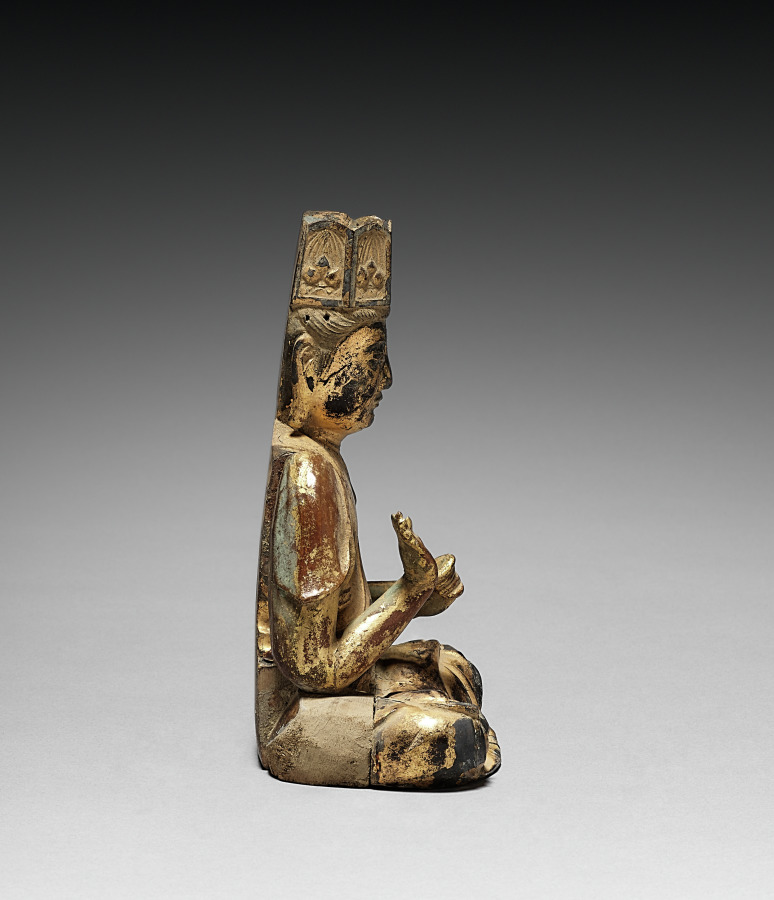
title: Bodhisattva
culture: Japan, Heian period (794–1185)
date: 900s-1100s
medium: gilded wood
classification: Sculpture